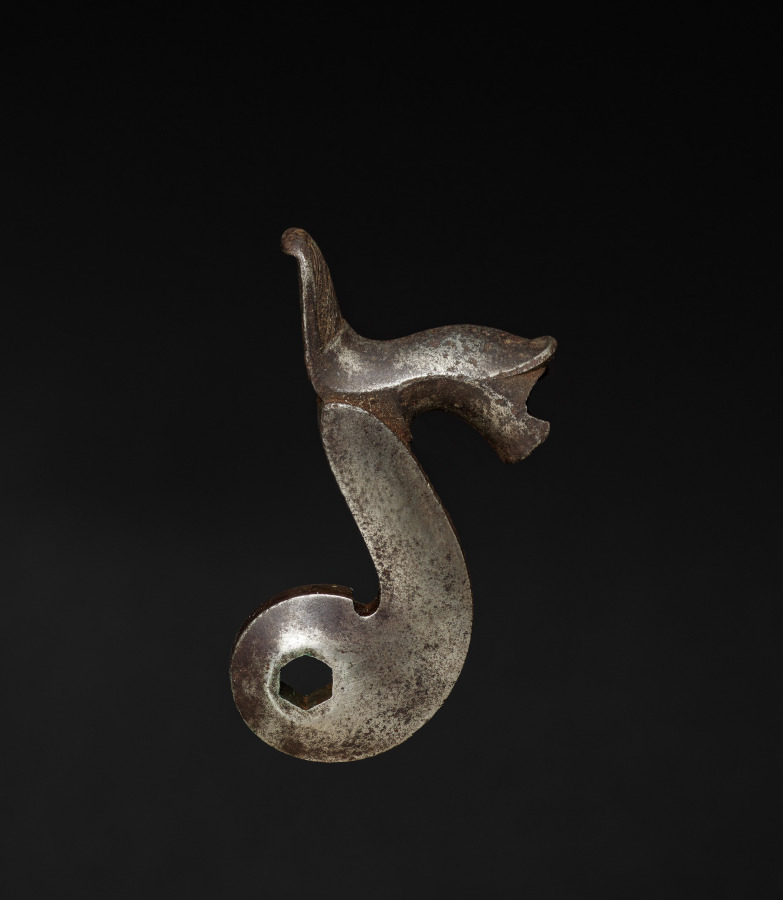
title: Gun-Lock Hammer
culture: England, early 19th century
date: c. 1800–1825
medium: steel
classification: Arms and Armor